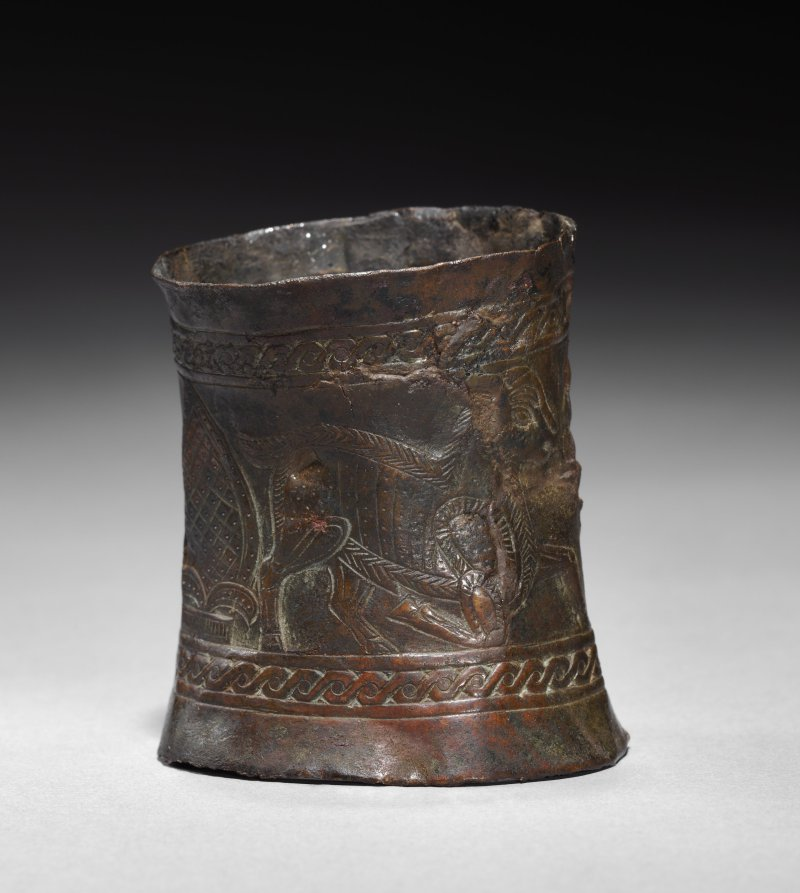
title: Decorated Cylinder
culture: Iran, Mannaean, Ziwiye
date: c. 1000–800 BCE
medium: bronze, repoussé and incised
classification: Metalwork